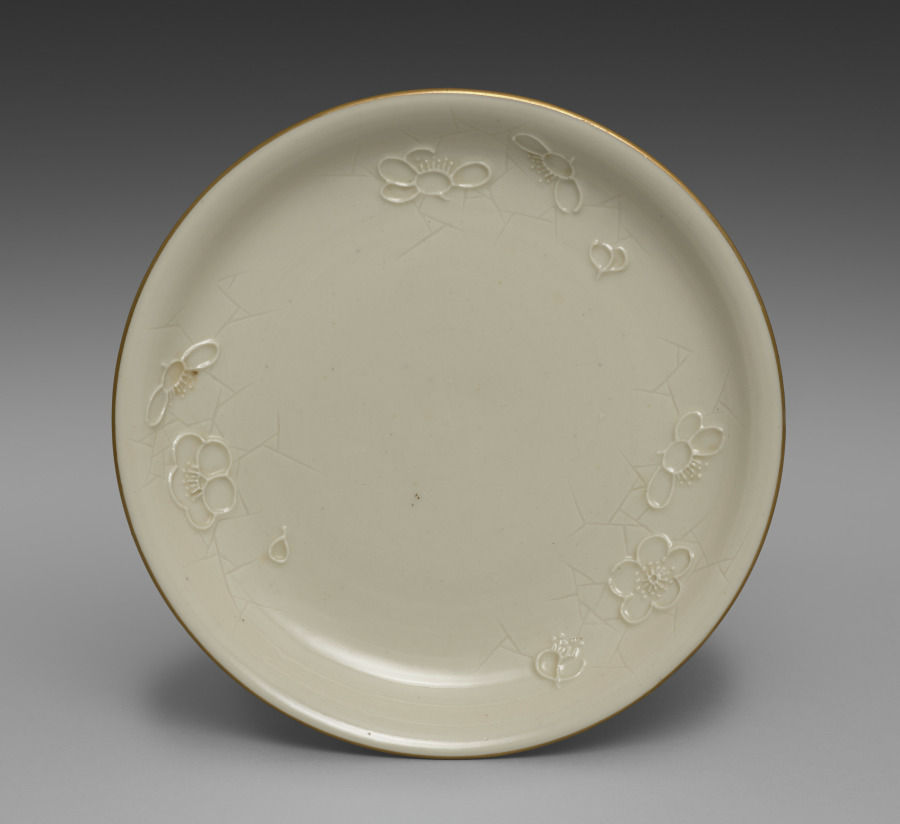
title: Medium-sized Dish from Dining Set with Plum Blossoms and Cracked-Ice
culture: Japan, Meiji period (1868–1912)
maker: Seifū Yohei II (Japanese, 1844–1878)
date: c. 1875–78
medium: Porcelain with molded designs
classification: Ceramic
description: Each item in this set has a delicate low-relief design of flowering plum branches over scattered, intersecting lines meant to resemble the cracked-ice surface of a frozen body of water and is signed on the base in gold pigment. While Yohei II produced many fine works in underglaze blue, like those produced by Kiyomizu Shichibei, he also made works in quite different styles later in his career, from the early 1870 s. In 1873, he was appointed purveyor to the Industrial Center of Kyoto Prefecture, a designation associated with Kyoto’s efforts to reach an international market through the port of Kobe; and from 1875 until his death, he was involved in national-level projects to present Japanese ceramics across the world. It was during this period that Yohei III was apprenticed to Yohei II, and it has been suggested that this set may in fact be an early example of Yohei III’s work, which he signed with his teacher’s name. Decorated with flowers resembling Japanese textile motifs, the set calls to mind the design of Yohei II’s pair of vases with plum blossoms in the Victoria and Albert Museum. Here, the elaborate trees created for a formal public exhibition setting have been translated into the approachable blossoms of the genteel domestic environment. While the designs are consistent across the pieces, each raised flower petal and pistil and each incised line in the ice was done by hand, so the cups, bowls, and dishes are similar yet unique. The bottoms of two boxes once identified the set’s owner, but the information has been deliberately obscured with black ink. However, inscriptions still visible appear to indicate two occasions, once at the end of July 1886 , and once again in June 1916 , when parts of the set were requested from Hokura in Niigata Prefecture. The location corresponds to a neighborhood in the present-day city of Jōetsu. The surname Tsuji 辻 also appears on a paper tag affixed to one of the box cloths. Future research may possibly reveal more about their provenance. A vase by Yohei III in a private collection combines the formal grandeur of the Yohei II vases in the Victoria and Albert Museum with the gentler design of this dining set, placing flowering plum trees against soft, scalloped-edge clouds resembling those in golden screens.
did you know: The dining wares have a creamy white coloration that the four boxes containing them identify as Korean in style.